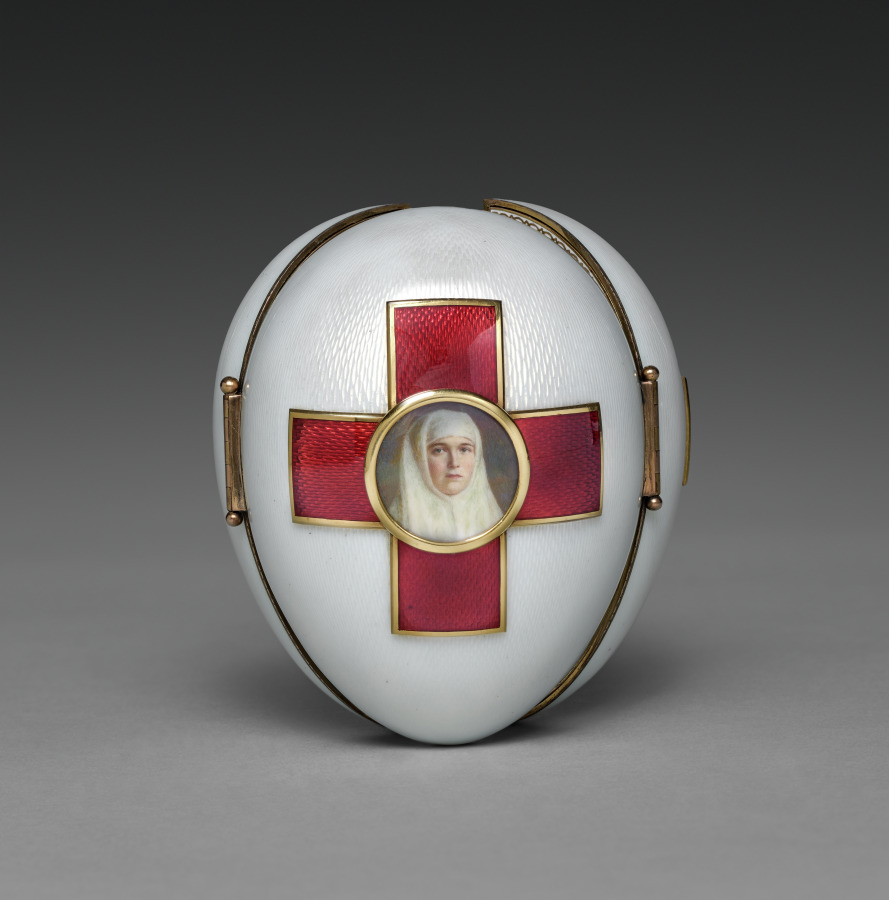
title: Imperial Red Cross Easter Egg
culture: Russia, St. Petersburg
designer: Peter Carl Fabergé (Russian, 1846–1920)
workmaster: Henrik Wigström (Russian, 1862–1923)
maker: House of Fabergé (Russian, 1842–1918)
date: 1915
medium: gold, silver gilt, enamel, glass, ivory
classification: Miscellaneous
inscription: inscribed on interior of egg: symbols for Alpha and Omega and imperial crown for Alexandra Feodorovna; 1915; inscriptions in Cyrillic, Old Church Slavonic, and Roman letters which identify Sts. Olga and Tatiana and presumably describe the central scene of the triptych.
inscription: Inscribed on silk velvet and satin lined case: double-headed eagle, Fabergé, Petersburg, Moscow, London (all in Cyrillic on lining of case); 17.559, abbreviation for "Red Cross" (in Cyrillic in red ink on outside of case).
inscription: Hallmarks: 72, Kokoshnik, lower case alpha in script [assay mark of St. Petersburg, 1908-26]; H.W. [initials of workmaster Henrik Wigström]; Fabergé (in Cyrillic).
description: The House of Fabergé made two imperial Easter eggs in 1915 that honored the contributions of Tsarina Alexandra and her two eldest daughters, Olga and Tatiana, to the war effort as Red Cross Sisters of Mercy. Compared to other Fabergé eggs elaborately ornamented with jewels, the eggs reflected the mood of austerity in Russia during World War I. This version becomes an icon when opened, revealing miniatures of the patron saints of the tsarina’s daughters. After the Russian Revolution, this relic of the Tsarist past was sold by the Soviet government to raise needed cash for the treasury.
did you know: This egg was confiscated by the Bolsheviks during the Russian Revolution and sold by the government of Josef Stalin in the 1930s to raise money for the Soviet treasury.